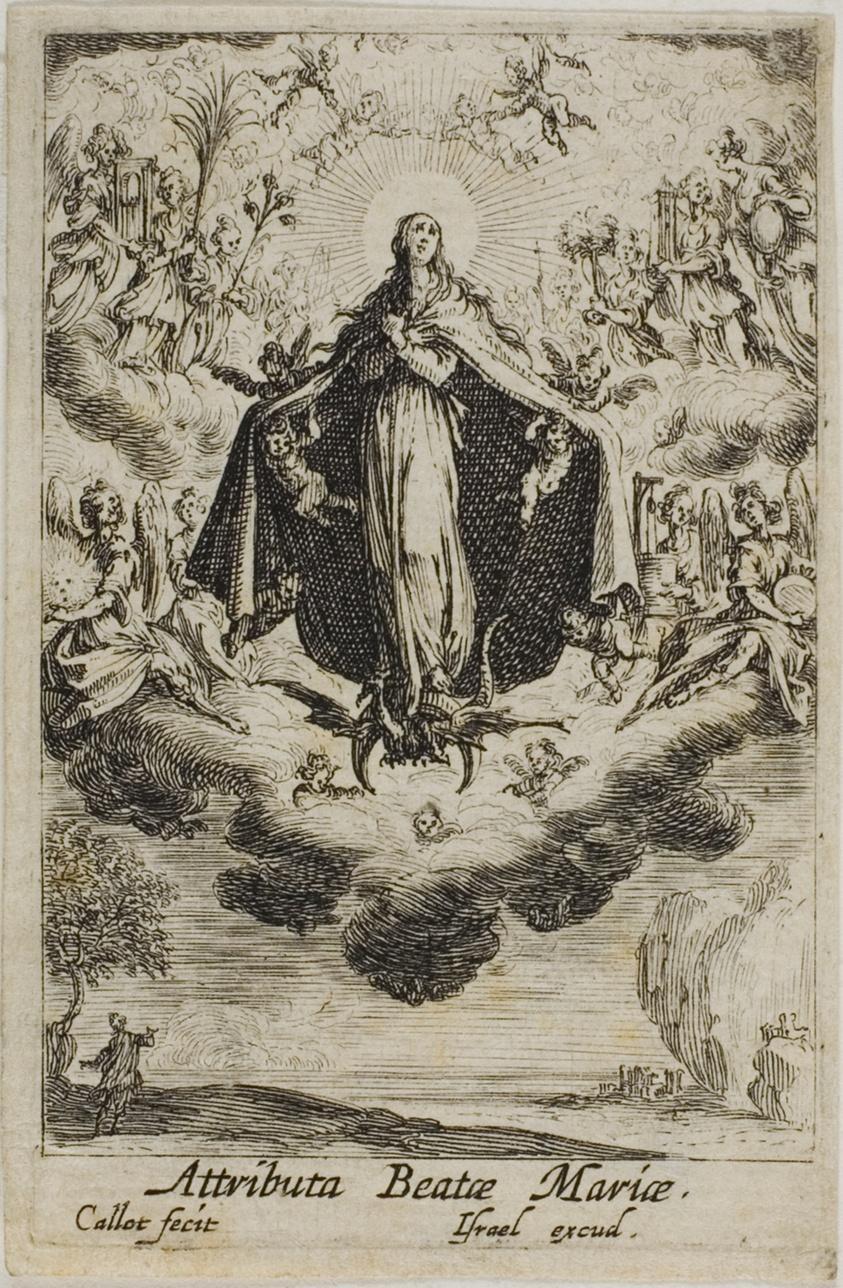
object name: Print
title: The Glorification of the Virgin, from The Life of the Virgin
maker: Jacques Callot (French, 1592-1635)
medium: Etching on paper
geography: France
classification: etching; print; prints and drawing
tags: Virgin Mary, Christian subjects, mythology, prints and drawings